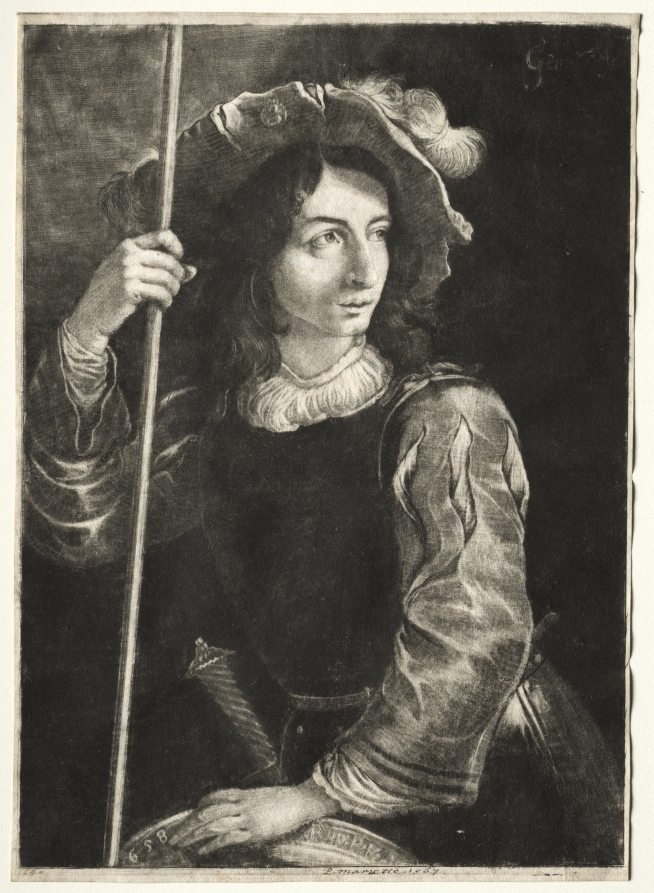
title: The Standard Bearer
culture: Germany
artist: Prince Ruprecht (German, 1619–1682)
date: 1658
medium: mezzotint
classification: Print